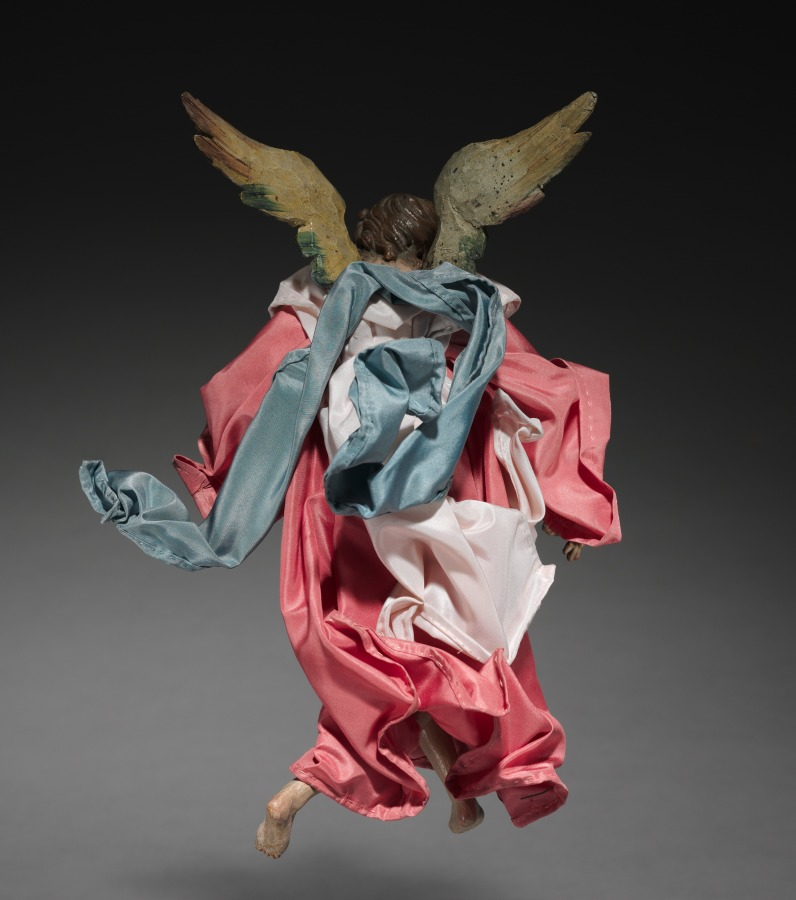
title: Figure from a Crèche: Angel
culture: Italy, Naples, late 18th-early 19th century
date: 1780–1830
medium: painted wood and terracotta with various textiles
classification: Sculpture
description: The practice of creating scenes of the Nativity for the home dates from the early 1700s in Italy, where people began to set up doll-like figures of about a foot or less in height. The custom was particularly popular in Naples around 1800, where crèche scenes (crèche means cradle, or crib) included many figures, whose heads and hands of painted terracotta, stuffed cloth bodies, and clothing adapted from contemporary local costumes gave them an amazingly realistic character. Representations of the birth of Jesus can be traced to the first few centuries of Christianity. Both living creatures and sculptural depictions of them were used from early times. By the late middle ages it was customary to create life-size figures of wood or stone, naturalistically painted, to represent the characters who participated in the events of Jesus's early life. These sculptures were then arranged in scenes illustrating one or both of the most important of these events, the Adoration of the Shepherds and the Adoration of the Magi-the three kings from the East who came to pay homage to the Christ child. Used in churches, these large figures were especially popular in Italy, Central Europe, Spain, and Portugal. This Object in Focus presentation was organized by Henry Hawley, Curator of Renaissance and Later Decorative Arts and Sculpture.